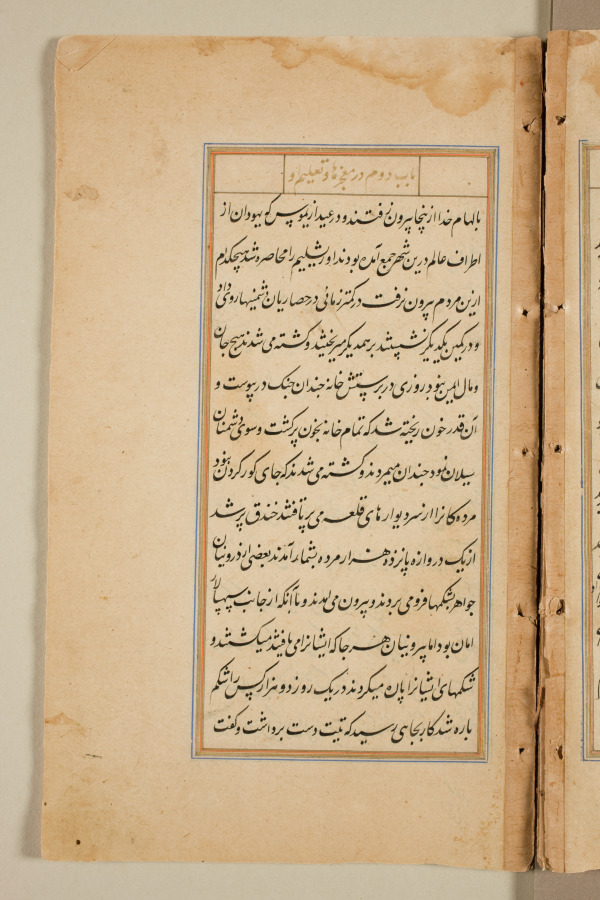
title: Text page from a Mirror of Holiness (Mir’at al-quds) of Father Jerome Xavier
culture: Mughal India, Allahabad, made for Prince Salim (1569–1627)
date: 1602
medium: Ink and gold on paper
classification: Manuscript